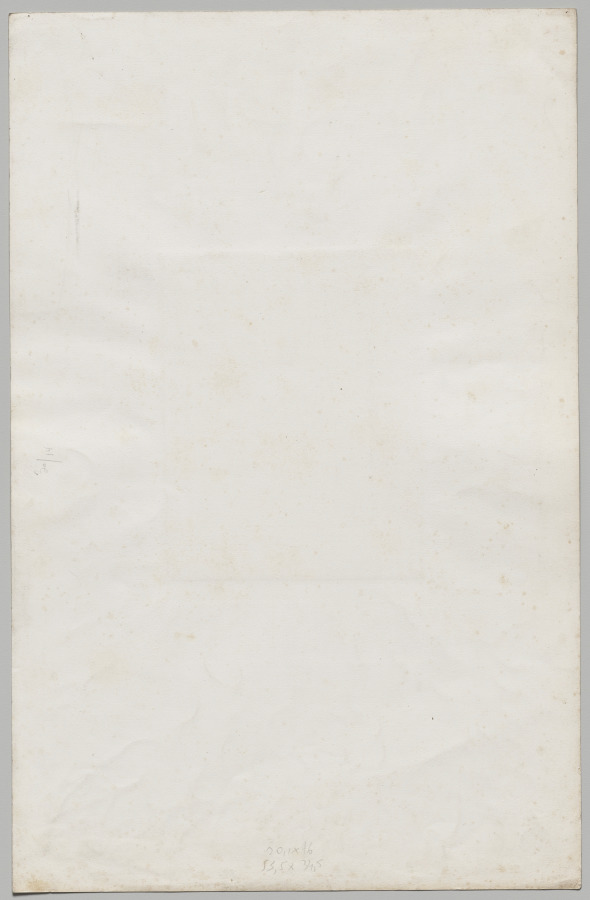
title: Fontaine du Jardin du Luxembourg (grotte de Marie de Médécis)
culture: France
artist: Charles Marville (French, 1813–1879)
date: c. 1850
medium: Salted paper print, Blanquart-Évrard process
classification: Photograph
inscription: Imprinted on recto: "Melanges Photographiques"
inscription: Imprinted on recto: "Imprimerie Photographique de Blanquart-Evrard a Lille"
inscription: Imprinted on recto: "36/Fontaine du Jardin du Luxembourg/(Grotte de Marie de Médicis)/Jacques de Brosse, 17em siecle"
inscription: Written in pencil on verso: "30/14"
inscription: Written in pencil on verso: "20.1 x 16/53.5x 34.5"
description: This fountain was part of those gardens. Charles Marville, who specialized in photographing landscapes, architecture, and urban views, made this photograph four decades after the fountain’s 1811 restoration, which added the white marble statue of Venus bathing. If you go to Paris now, you will see the 1864 restoration, which radically restructured it and moved it 100 feet to make way for a street.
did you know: In the 1620s, French queen Marie de’ Medici built an Italianate palace and gardens on Paris’s Left Bank.